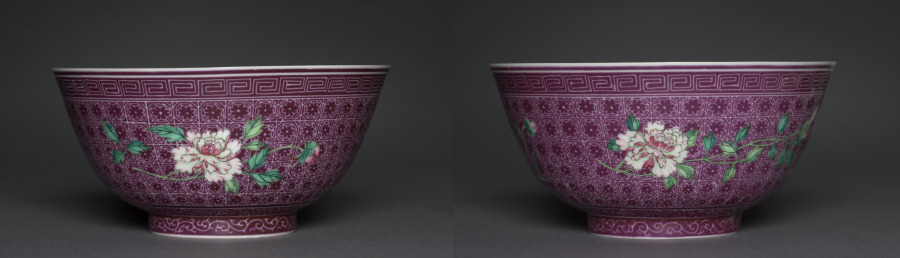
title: Pair of Bowls with Peony Sprays on Diaper Ground (exterior); Chrysanthemum Sprays (interior)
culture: China, Jiangxi Province, Jingdezhen, Qing dynasty (1644–1911), Qianlong mark and reign (1736–95)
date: 1736–95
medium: porcelain with famille rose overglaze enamel decoration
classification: Ceramic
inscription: 乾隆年製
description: The production of extraordinarily refined Qing imperial wares such as these could have involved the transportation of undecorated, plain porcelains from the imperial kilns in Jingdezhen, Jiangxi province, to the palace workshops in Beijing, where court painters applied the polychrome enamel decoration. The Qianlong reign mark on the base of the bowl is written with blue enamel over the transparent glaze.